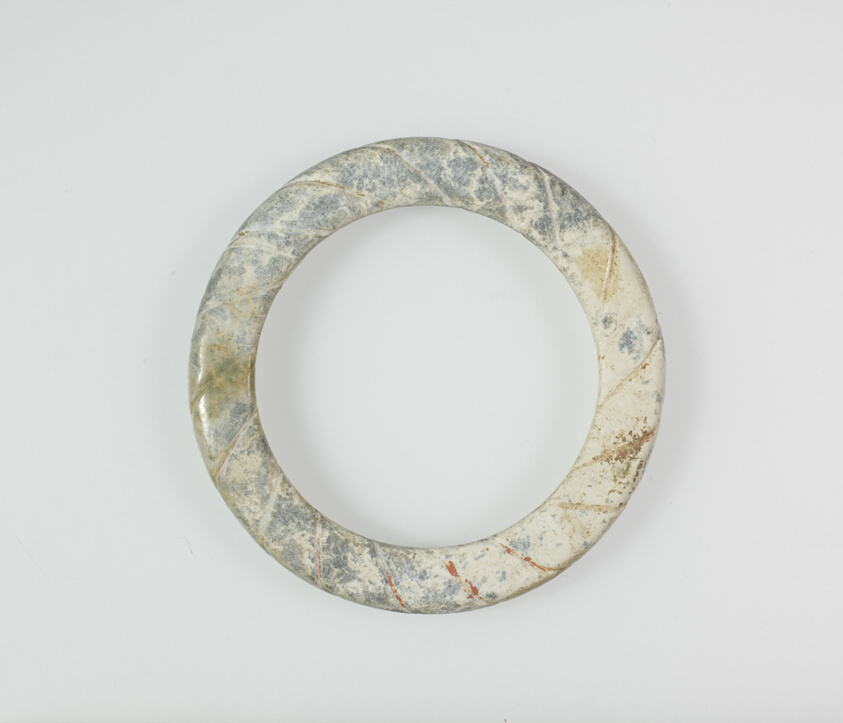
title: Ring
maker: China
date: Early Western Zhou dynasty (1047BC-772BC)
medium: Jade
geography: China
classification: jade; asian art